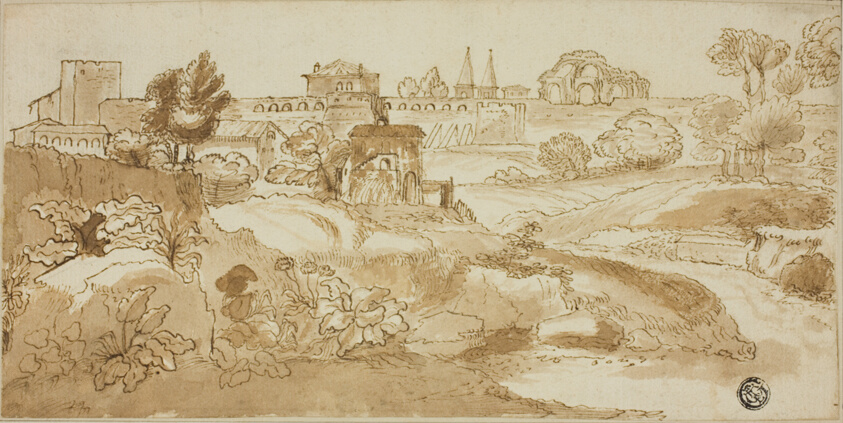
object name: Drawing and Watercolor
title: View of Rome, with via Appia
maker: After Giovanni Francesco Grimaldi; Italian, 1606-1680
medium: Pen and brown ink, with brush and brown wash, on ivory laid paper, laid down on ivory laid card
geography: Italy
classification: pen and ink drawings; drawings (visual works); prints and drawing